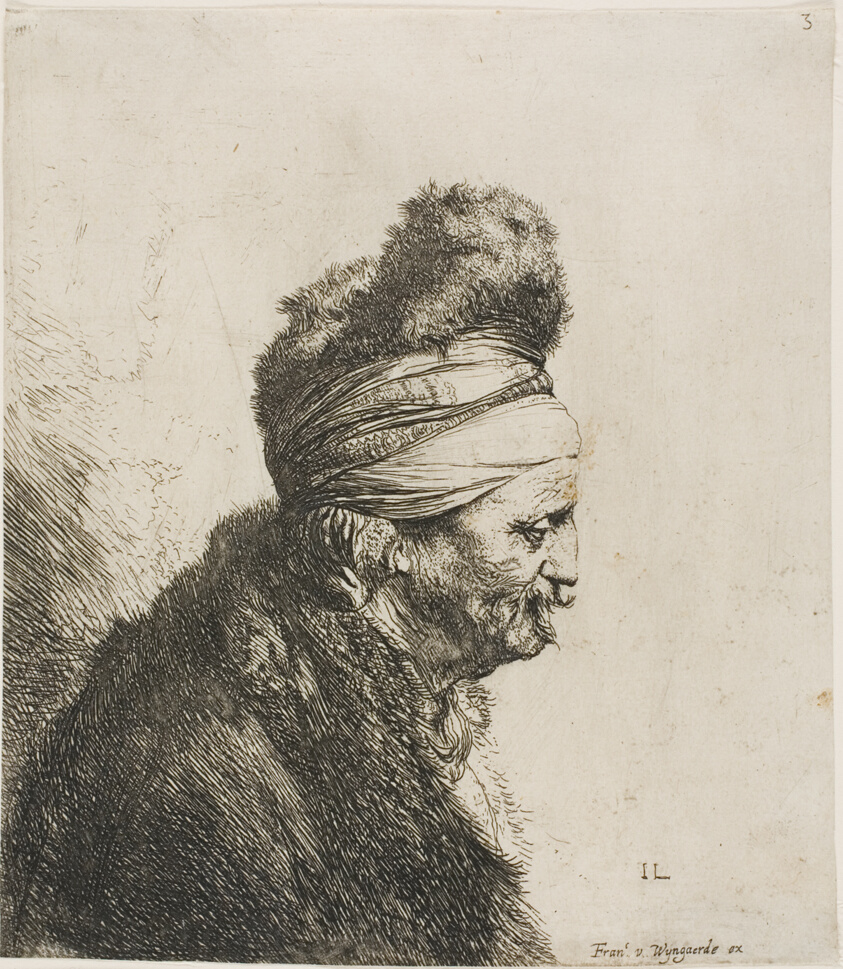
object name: Print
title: Bust of an Old Man Wearing a Fur Cap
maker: Jan Lievens (Dutch, 1607-1674)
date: 1635–44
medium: Etching on ivory laid paper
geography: Holland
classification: etching; print; prints and drawing